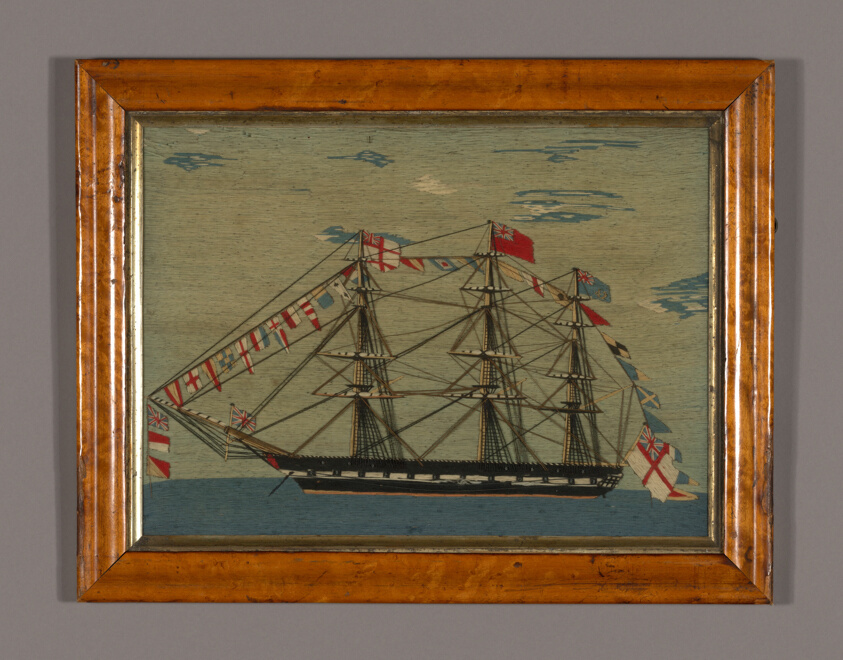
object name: Textile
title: Picture (Needlework)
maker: England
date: 1825/75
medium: Linen, plain weave; embroidered with wool and linen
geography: England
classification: textile; needlework (visual works)